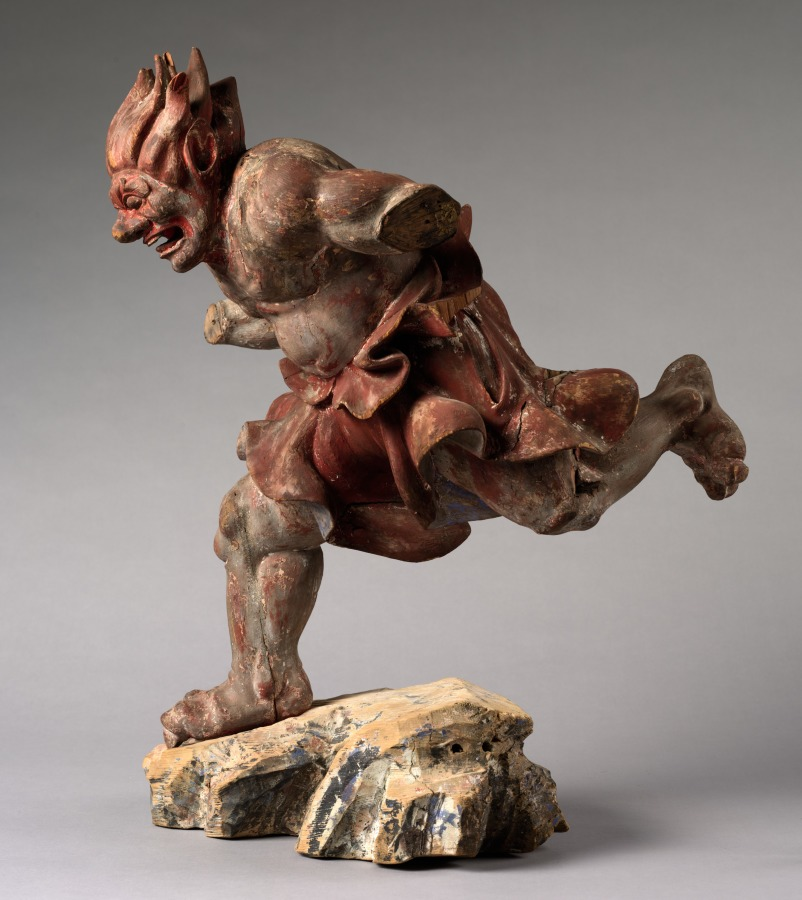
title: Thunder God (Raijin)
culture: Japan, Kamakura period (1185–1333)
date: 1300s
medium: wood with traces of gesso and red and black pigment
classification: Sculpture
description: The Thunder (Raijin) and Wind (Fujin) gods first appeared in early Buddhist art in China and Japan and were based on the popular imagery in India that was derived from the life of the historical Buddha, Shakyamuni. They were shown among a group of demon-monsters flying through the sky above the meditating Shakyamuni in an attempt to frighten away his concentration. Raijin is surrounded by a ring of small drums struck by a stick held in his hand so that he is always accompanied by a thunderous noise. A metal clasp protruding from this sculptures' back indicates that a ring of drums was once attached to the Cleveland Raijin. The matching sculpture, Fujin, is in the Fukuoka Art Museum in Japan.